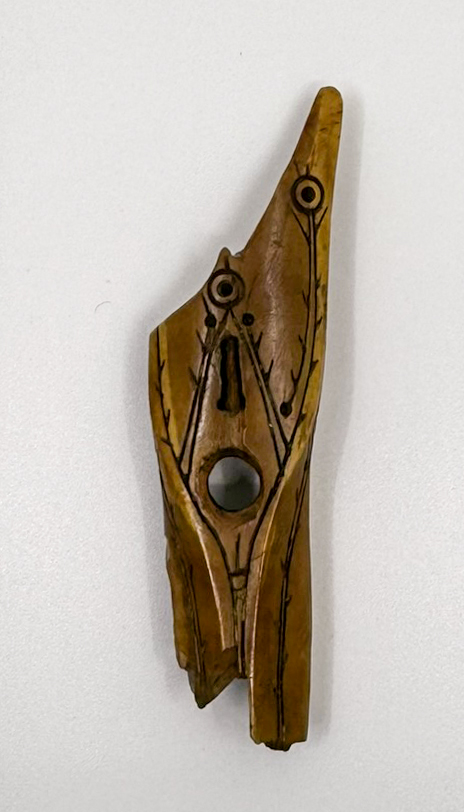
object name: Decorative Arts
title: Harpoon Toggle with Central Hole and Incised Designs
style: punuk, eskimo, Pre-Columbian, americas, Arts of the Americas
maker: Carver unknown (Punuk); Seklowaghayaget, St. Lawrence Island, Alaska, United States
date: 800–1000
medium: Walrus ivory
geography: Alaska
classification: ivory; american decorative arts; tool; decorative arts; art of the americas